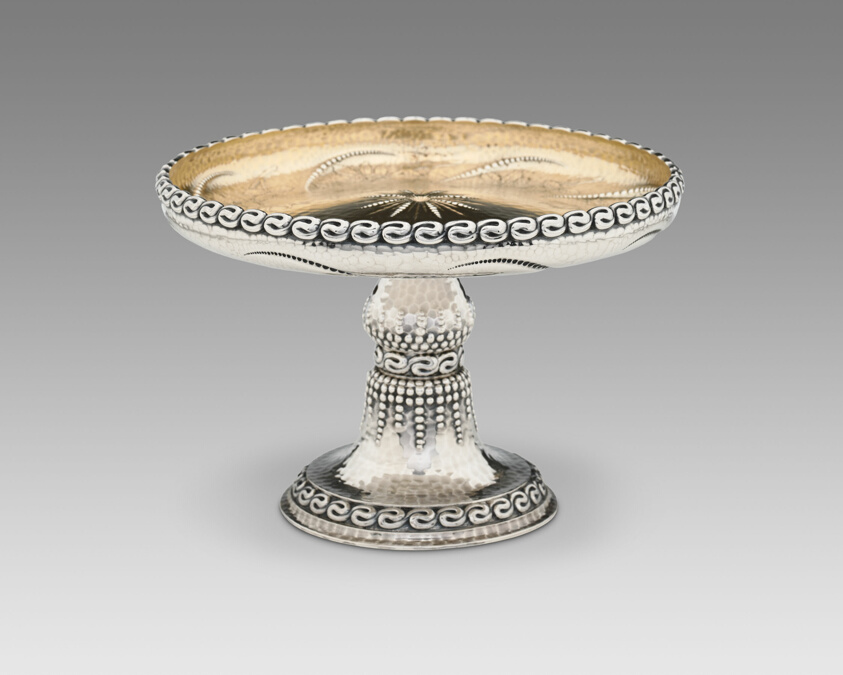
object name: Metalwork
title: Compote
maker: Design attributed to Charles Osborne (American, 1847–1920); Tiffany and Company (American, founded 1837); New York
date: c. 1882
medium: Silver and silver gilt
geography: New York City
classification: compote; silver; american decorative arts; american arts; decorative arts